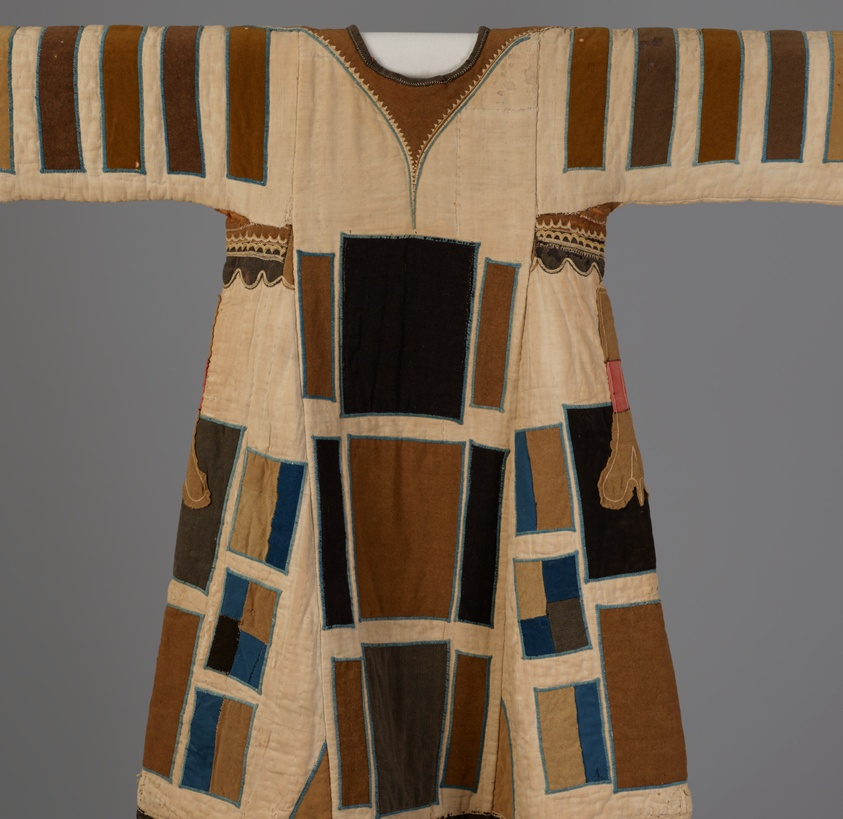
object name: Costume and Accessories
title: Tunic (Jibbeh)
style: Arts of Africa, 19th century, east african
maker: Mahdiyya State, Sudan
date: 1885/99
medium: Layers of cotton, plain weave; pieced and quilted; appliquéd with wool and wool and cotton plain weaves and wool twill weaves; embroidered with cotton in chain, cross, and a derivative of herringbone stitches; applied plied yarn edging; lined with cotton plain weaves; pieced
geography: Sudan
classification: tunic; arts of Africa; costume; garment; textile; dress (garment)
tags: garment, rectangles, black (color), tan (color), brown (color), lines, colonialism, Freedom, military, military uniforms, soldiers, uniforms